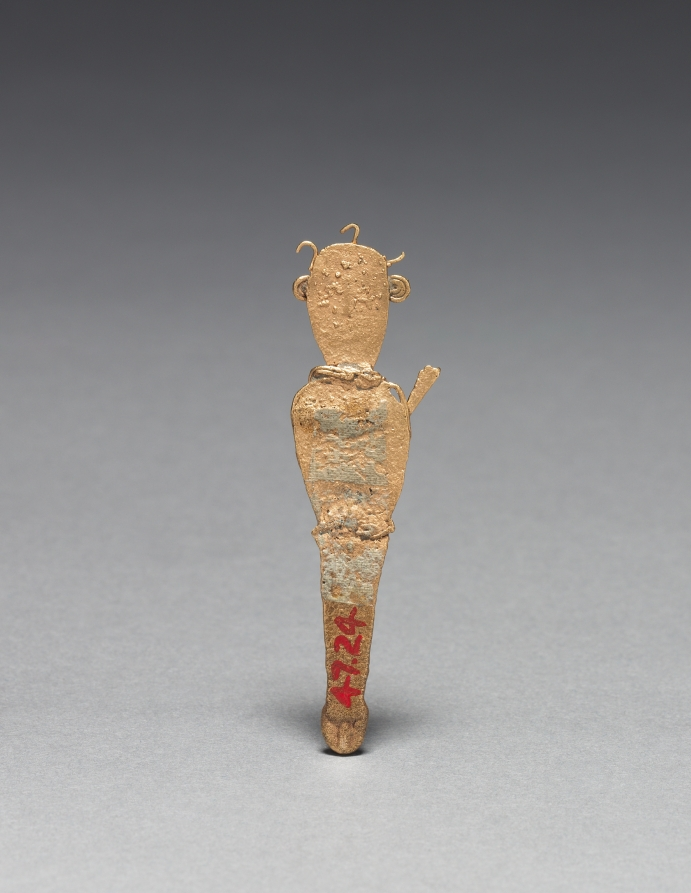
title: Tunjos (Votive Offering Figurine)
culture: Colombia, Muisca style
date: c. 900–1550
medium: cast gold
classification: Metalwork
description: Unlike the other gold ornaments made in the isthmian region, tunjos were not worn; instead, they served as offerings that were deposited in sacred places such as lagoons and caves. They often depict humans who hold something. Perhaps because they were not meant for display, tunjos were not finished after lost-wax casting. Flaws remain uncorrected, surfaces are unpolished, and gold that backed into the channel used to pour the molten metal into the mold was left in place.